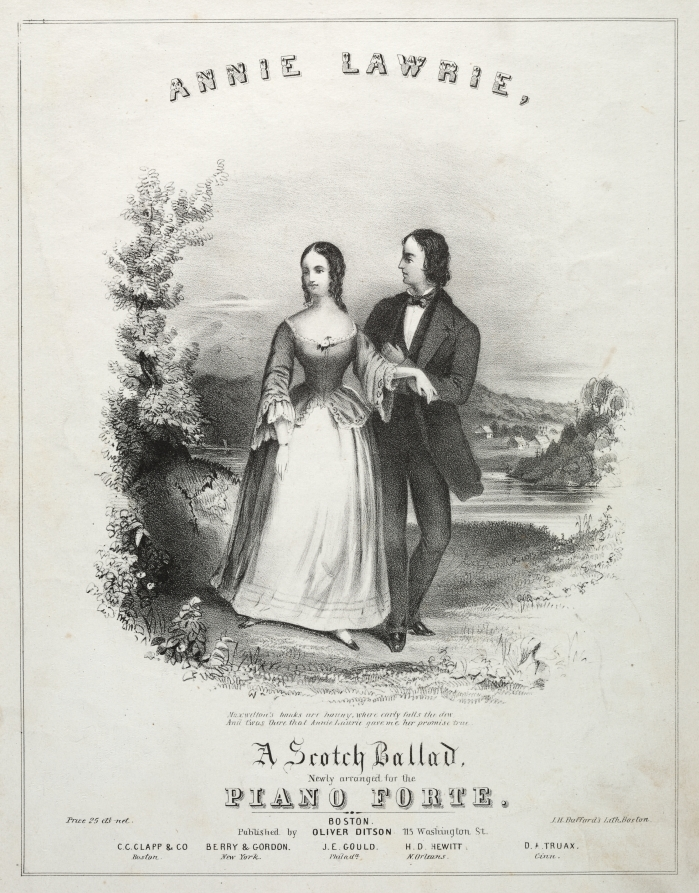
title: Annie Lawrie - Sheet Music Cover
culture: America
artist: Winslow Homer (American, 1836–1910)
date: c. 1855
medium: lithograph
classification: Print